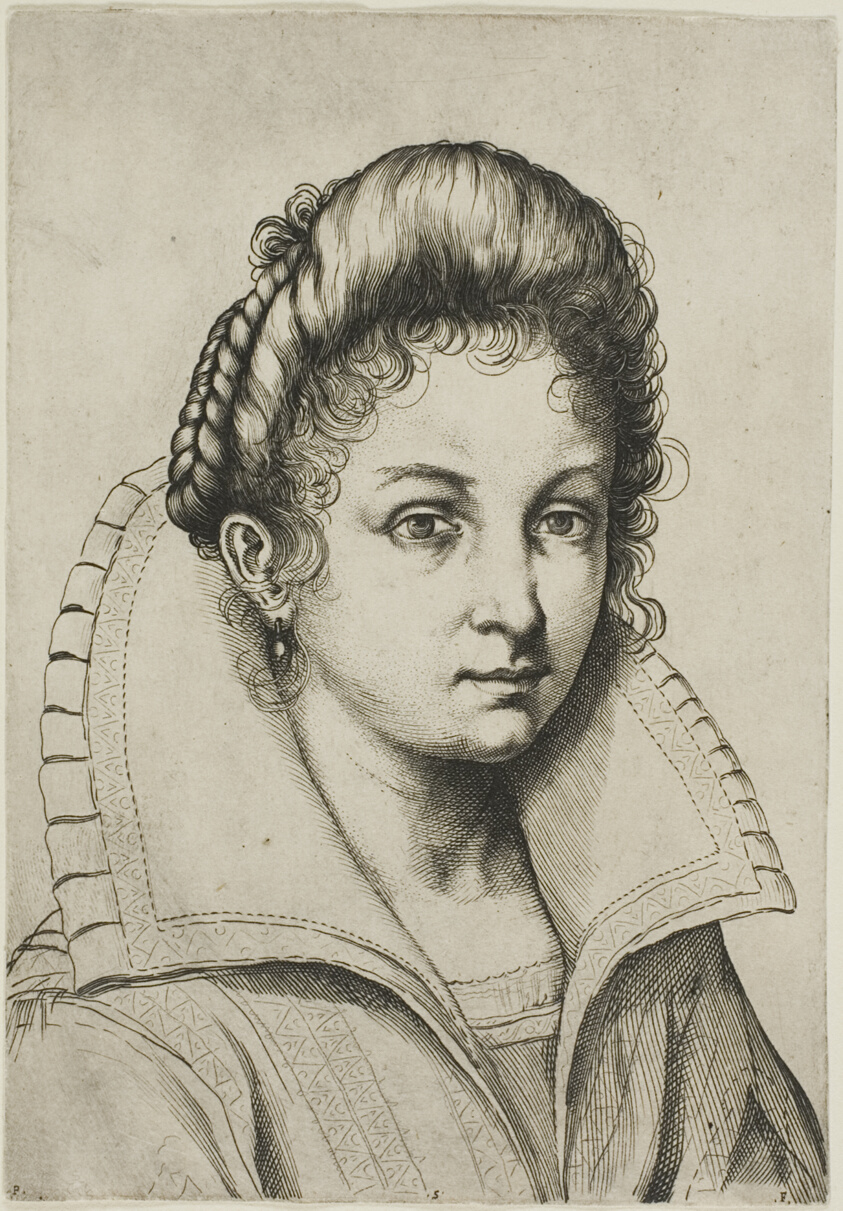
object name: Print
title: Portrait Bust of a Woman with a Large Collar, from Perfect School to Learn How to Draw the Entire Human Body (English translation)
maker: Luca Ciamberlano (Italian, c. 1580-c. 1641); after Agostino Carracci (Italian, 1557-1602)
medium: Engraving in black on ivory laid paper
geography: Italy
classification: engraving; print; prints and drawing